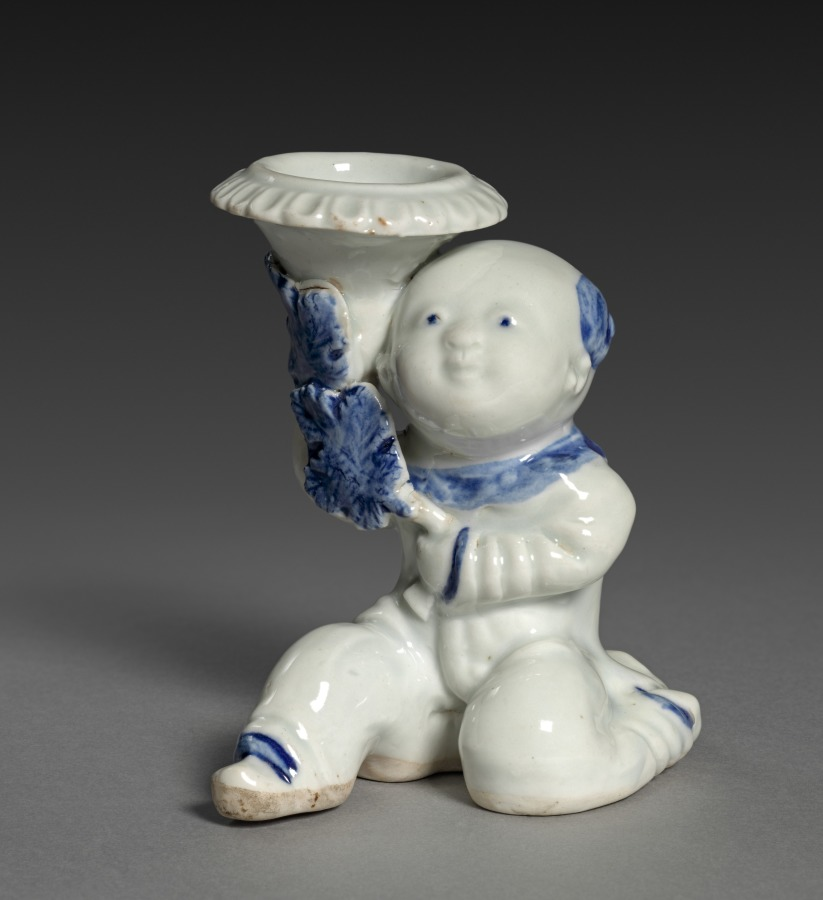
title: Kneeling Boy Holding a Vase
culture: Japan, Edo period (1615–1868)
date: 1700s-1800s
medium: porcelain, molded and carved, with underglaze blue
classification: Ceramic